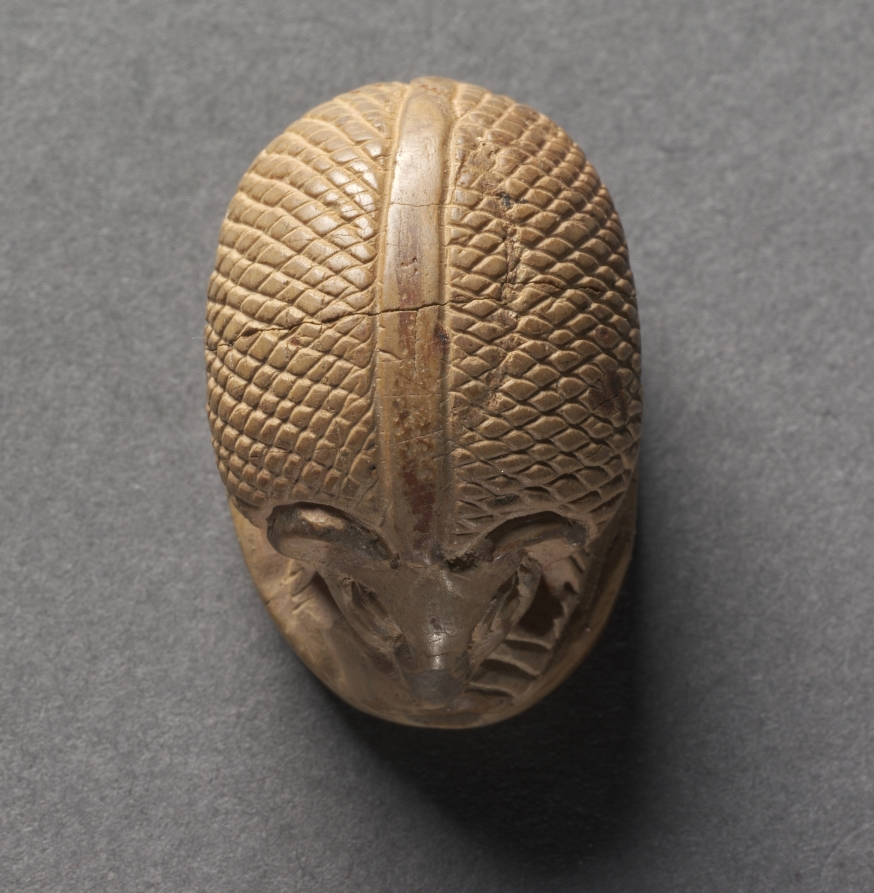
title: Hedgehog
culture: Egypt, New Kingdom (1540–1069 BCE), Dynasty 18, reign of Amenhotep III (1390–1352 BCE)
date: c. 1391–1353 BCE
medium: steatite, originally glazed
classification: Scarabs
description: This hedgehog (Paraechinus aethiopicus) stands in the round on an oval base, with openwork defining the legs. The carving is delicate and spirited. The face features large, round eyes; widely spaced, short ears; bulging cheeks; and a protruding snout. A tiny tail hangs at the rear. Crosshatching on the back represents the animal's spines. The design on the base begins at the head with a winged sun disk with pendant uraei. Below is a cluster of hieroglyphic signs, including an ankh-sign, a falcon with a sun disk, a hoe, and a maat-feather. A neb-sign fills the balance below. The significance of the hedgehog has multiple theories. As a hibernating animal, it may have associated with the powers of self-renewal and resurrection. Another lies in the animal's defensive strategy of inflating itself into a ball and projecting its spines, a posture of obvious apotropaic significance. Lastly, Egyptian folklore maintained that hedgehog amulets provided protection against snake bites, a belief grounded in the animal's natural resistance to poison.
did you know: Hedgehogs were common on amulets in the New Kingdom (1500s–1000s BC) and can also be seen on the backs of seals and scaraboids.